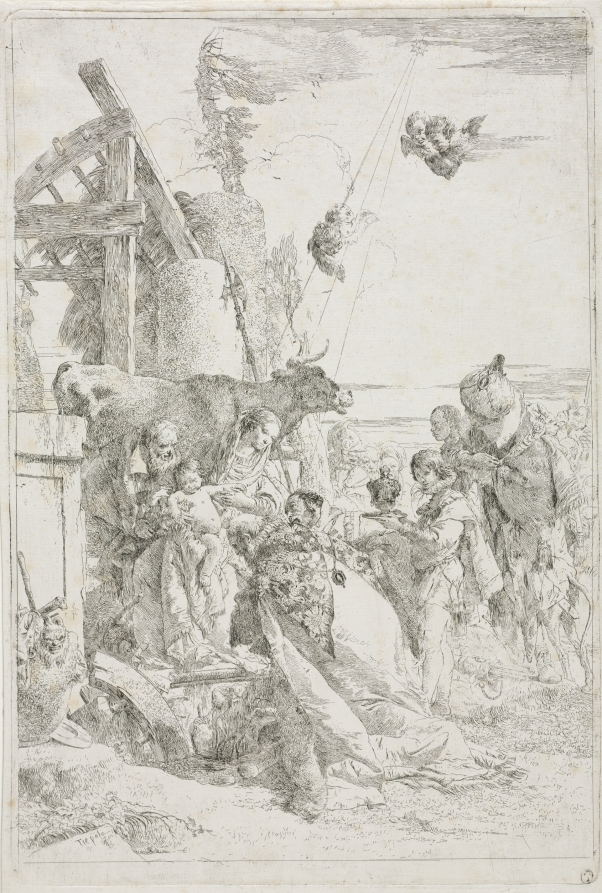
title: Adoration of the Magi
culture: Italy, 18th century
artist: Giovanni Battista Tiepolo (Italian, 1696–1770)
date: ca. 1740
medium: etching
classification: Print